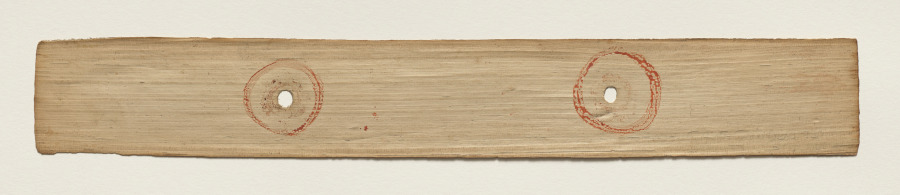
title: Leaf from a Buddhist Manuscript (verso)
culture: Sri Lanka, Singhalese, Late 17th century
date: c. 1700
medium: fiber paper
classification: Manuscript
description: Palm leaf material is still used for manuscripts in Sri Lanka. The palm leaves are prepared first by boiling them, drying them in the sun, and then rubbing them with oils. Scribes then use a metal stylus to incise the text. Then charcoal powder is wiped across the pages, filling in only the inscribed lines.